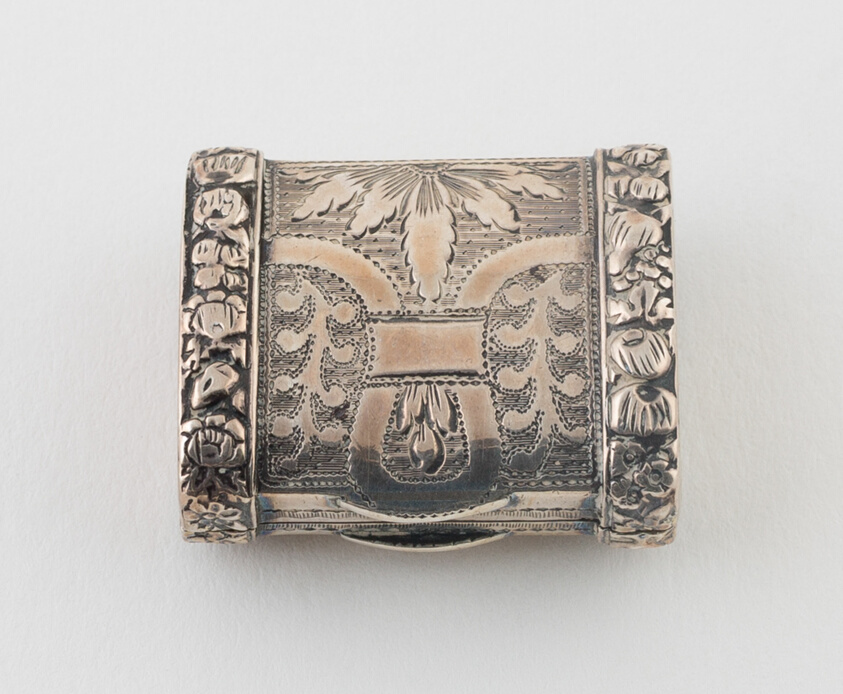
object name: Metalwork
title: Purse-Shaped Vinaigrette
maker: Possibly John Turner; Birmingham, England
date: 1818/19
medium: Silver and silver gilt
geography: Birmingham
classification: container for personal use; vinaigrette (container for health care); european decorative arts; metalwork; silver; decorative object/ornament